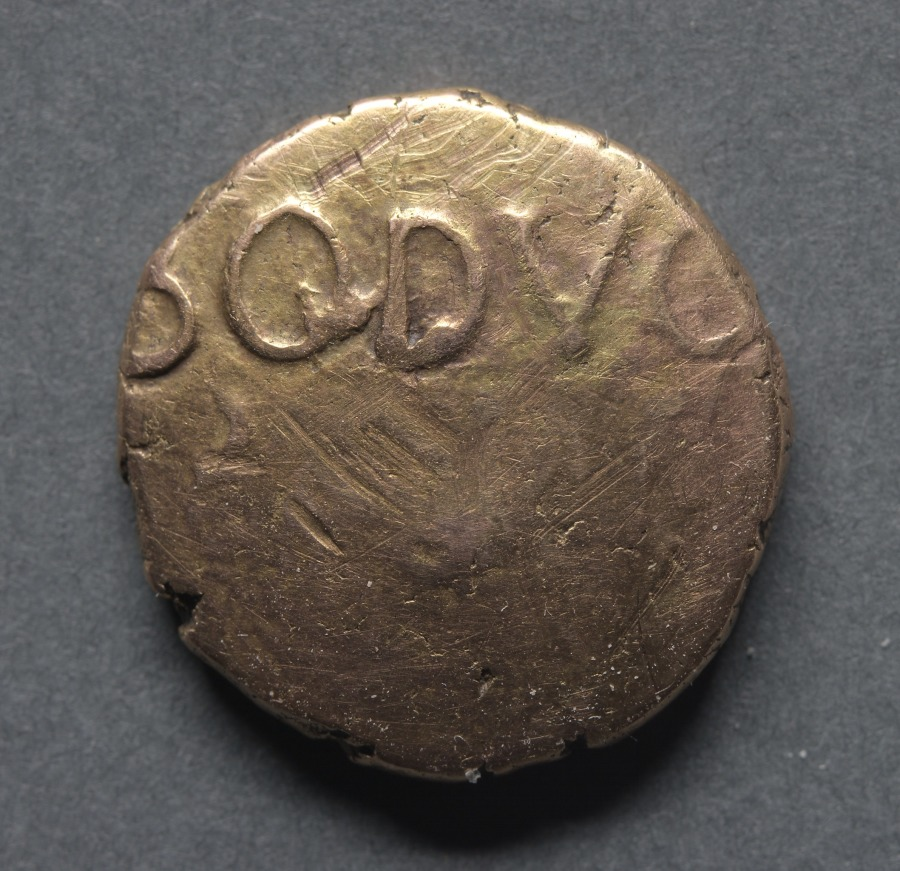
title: Stater: BODVOC on plain field (obverse); Horse, Wheel, and Crescent (reverse)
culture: England, Dobunni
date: 10 BCE–20 CE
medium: gold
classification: Coins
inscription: BODVO[C].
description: On coins in this same series the obverse legend (BODVOC) changes position. On some it is central across the field and complete, on others above and incomplete as seen here. As far as is known Bodvoc was one of the rulers of the Dobunni tribe. The horse has become even more crude, made up of lines and pellets and rough curves. The spokes of the wheel fail to meet nearly at the center.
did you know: The Dobunni were a tribe that lived on the British Isles prior to the Roman invasion of Britain.